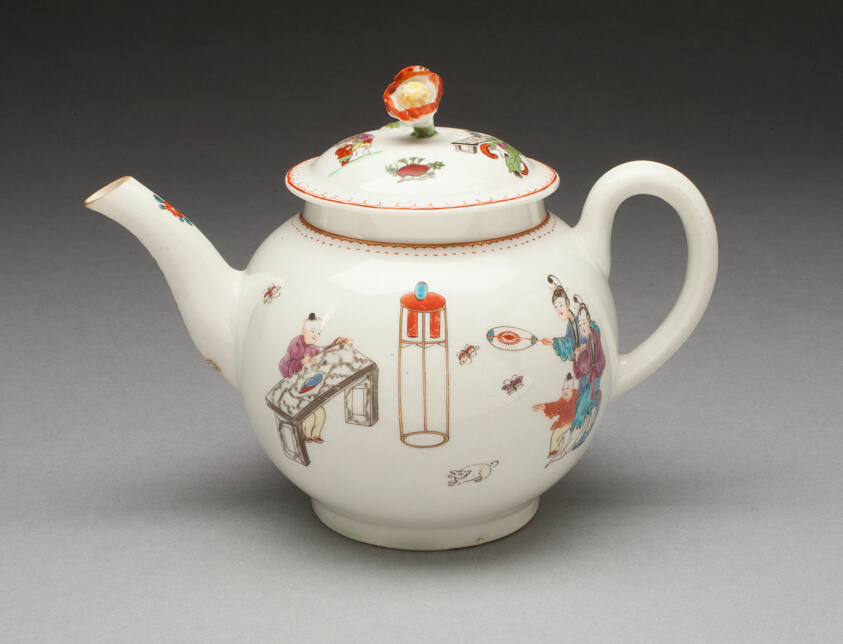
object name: Ceramics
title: Teapot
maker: Worcester Porcelain Factory (Warmstry House Period, 1751–1783); Worcester, England, founded 1751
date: c. 1760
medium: Soft-paste porcelain with polychrome enamels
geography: Worcester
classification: teapot; teaware; porcelain; european decorative arts; ceramics